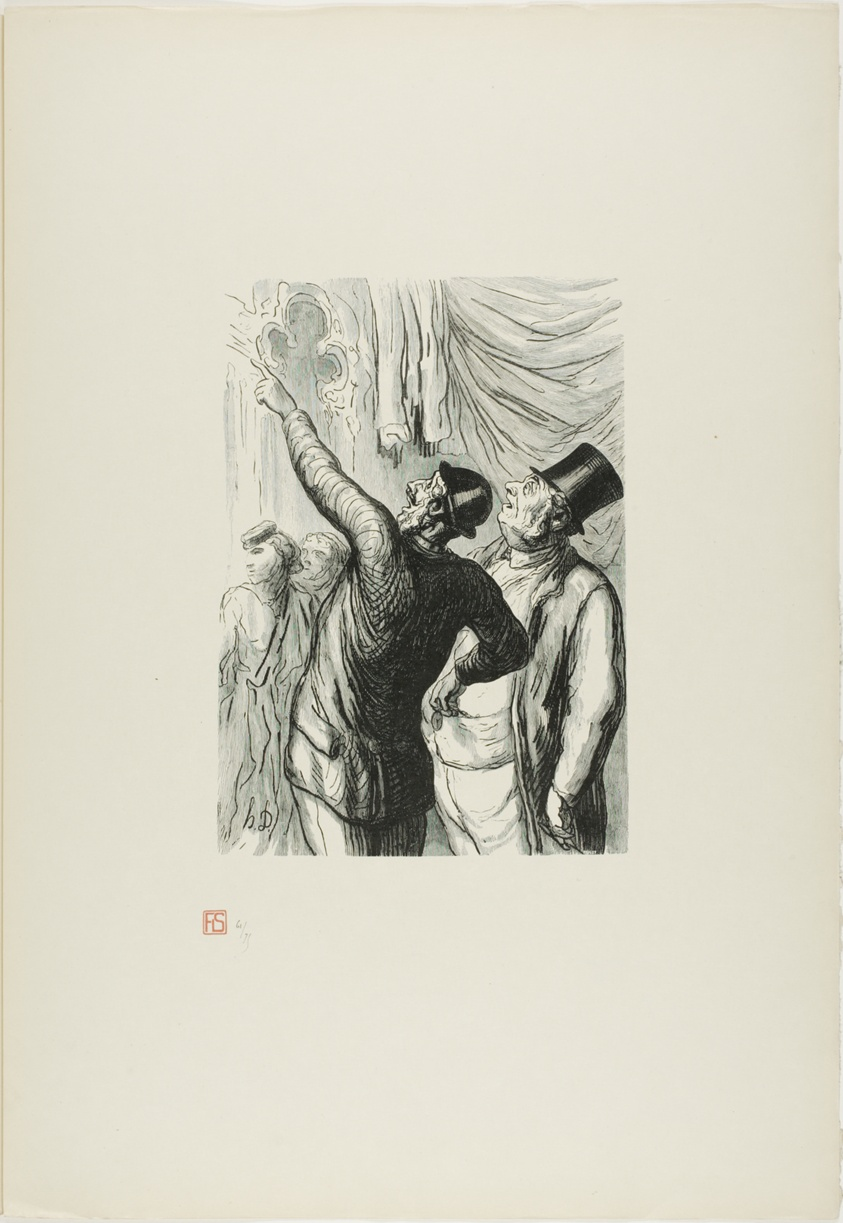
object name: Print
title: At the Universal Exposition: The Perfect Guide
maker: Julien Antoine Peulot (French, born 1827); after Honoré Victorin Daumier (French, 1808-1879); printed by François Louis Schmied (Swiss, 1873-1941); published by Jules Meynial (French, 20th century)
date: 1867, printed 1920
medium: Wood engraving on cream Japanese paper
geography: France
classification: wood engraving; print; prints and drawing